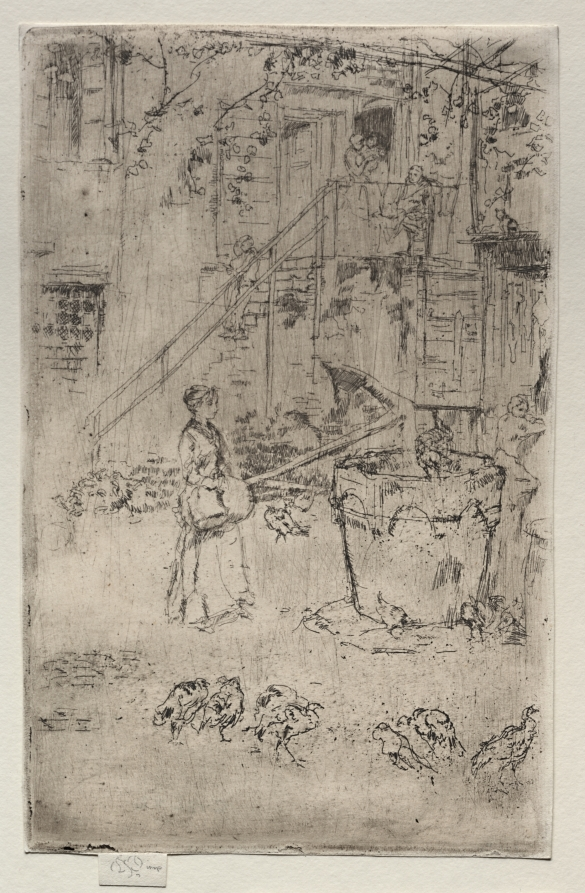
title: Turkeys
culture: America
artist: James McNeill Whistler (American, 1834–1903)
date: 1886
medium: etching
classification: Print